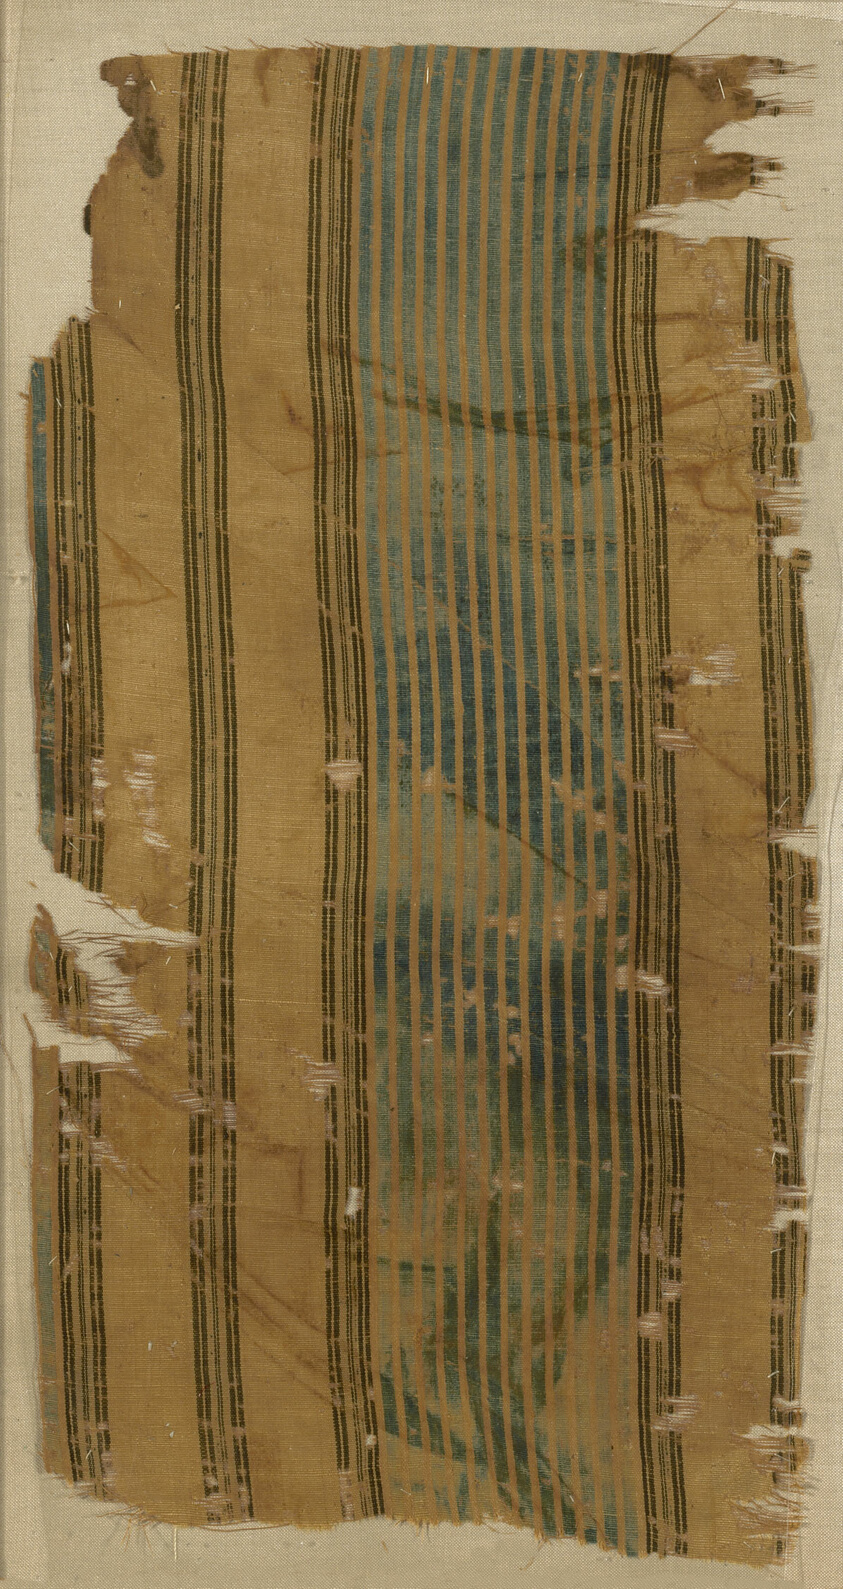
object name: Textile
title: Fragment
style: arabian, mamluk, ayyubid, fatimid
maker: Egypt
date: Arab period (641–969)/Fatimid period (969–1171)/Ayyubid period (1171–1250)/ Mamluk period (1250–1517), 9th/13th century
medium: cloth weave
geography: Egypt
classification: textile; weaving